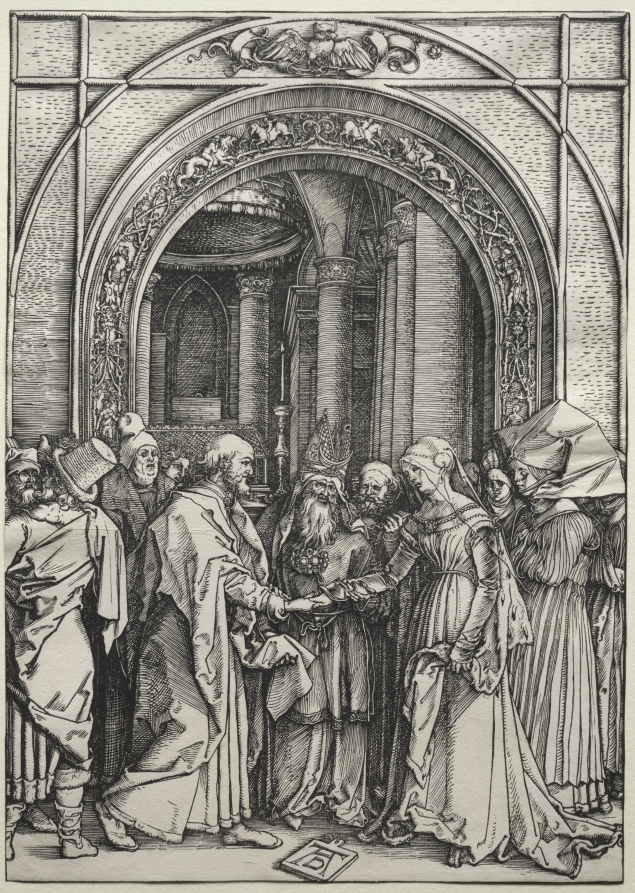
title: The Betrothal of the Virgin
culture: Germany, early 16th Century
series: The Life of the Virgin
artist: Albrecht Dürer (German, 1471–1528)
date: c. 1504–1505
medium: woodcut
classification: Print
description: Dürer devoted three woodcuts (1959.99.5-7) to the significant events in Mary’s youth prior to her sacred calling. His depiction of her birth recalls a contemporary birthing scene, complete with midwives, female friends, and relatives. Anna rests from her efforts in the background while an attendant bathes the infant Mary in the immediate right foreground. The religious significance of the event is made known by the presence of an angel above. In the subsequent prints Mary is presented several years later at the temple (running up the stairs), followed by her betrothal to an older widowed man named Joseph.